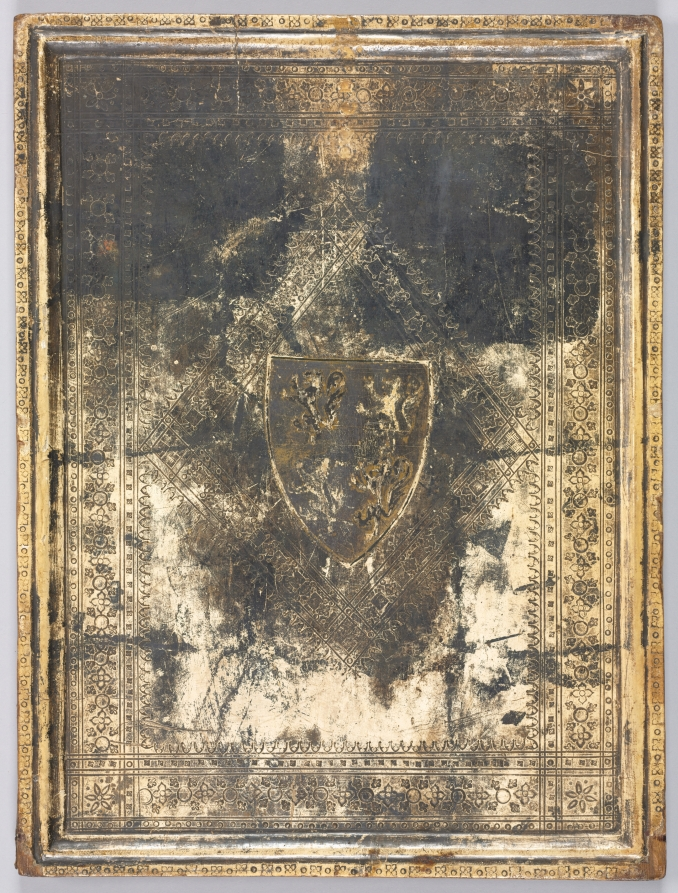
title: The Annunciation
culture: Netherlands, or possibly France, 14th century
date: 1380s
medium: tempera and oil with gold on wood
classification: Painting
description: This small but opulent panel painting was once joined to another panel with hinges to form a diptych. Given its small size, its original function was for private devotional use. It could be folded like a book when not in use and was highly portable. The missing panel has not been positively identified but probably represented another biblical scene like the Crucifixion. The painting’s refined and ornate style reflects the courtly aesthetic that appealed to royal and aristocratic patrons in the decades around 1400. On the panel’s richly tooled reverse (not visible) are the arms of the house of Hainault quartered with those of Bavaria. While this coat of arms is certainly that of the work’s patron, probably a member of the united dynasties of Hainault and Bavaria, their identity remains elusive.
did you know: In this depiction of Gabriel, the angel's wings resemble the feathers of a peacock.